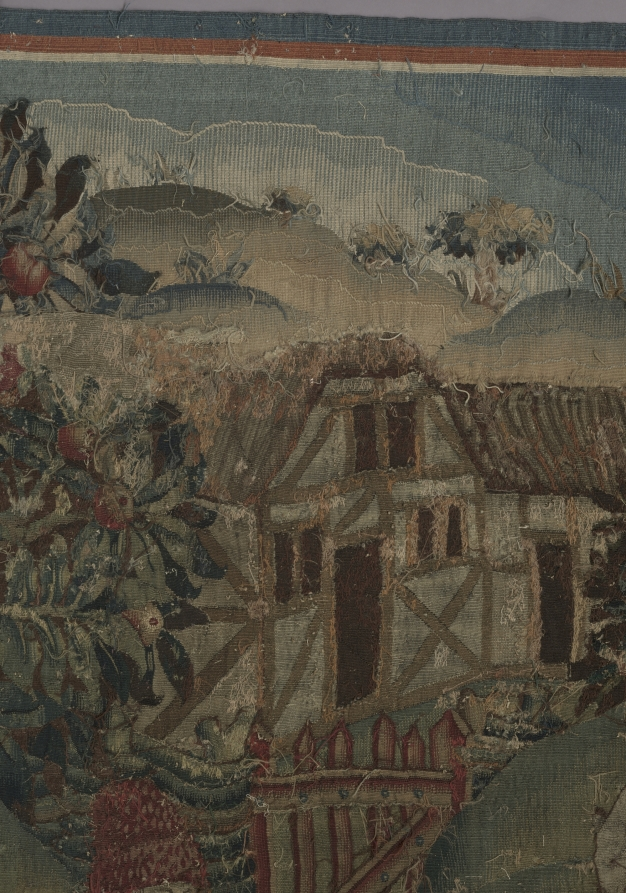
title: Shepherds in a Round Dance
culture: Netherlands, early 16th century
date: around 1500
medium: Wool and silk: tapestry weave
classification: Tapestry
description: Late medieval tapestries often use a limited yet contrasting color palette to portray stylized images. The expressions of these figures, for example, are conveyed more by their postures than by their faces. Four shepherds and shepherdesses join hands and dance to the music of a bagpiper at the far right, while a lord and two ladies on the left look on. A dog and sheep amid blossoming plants and trees contribute to the festive pastoral scene in front of a castle.